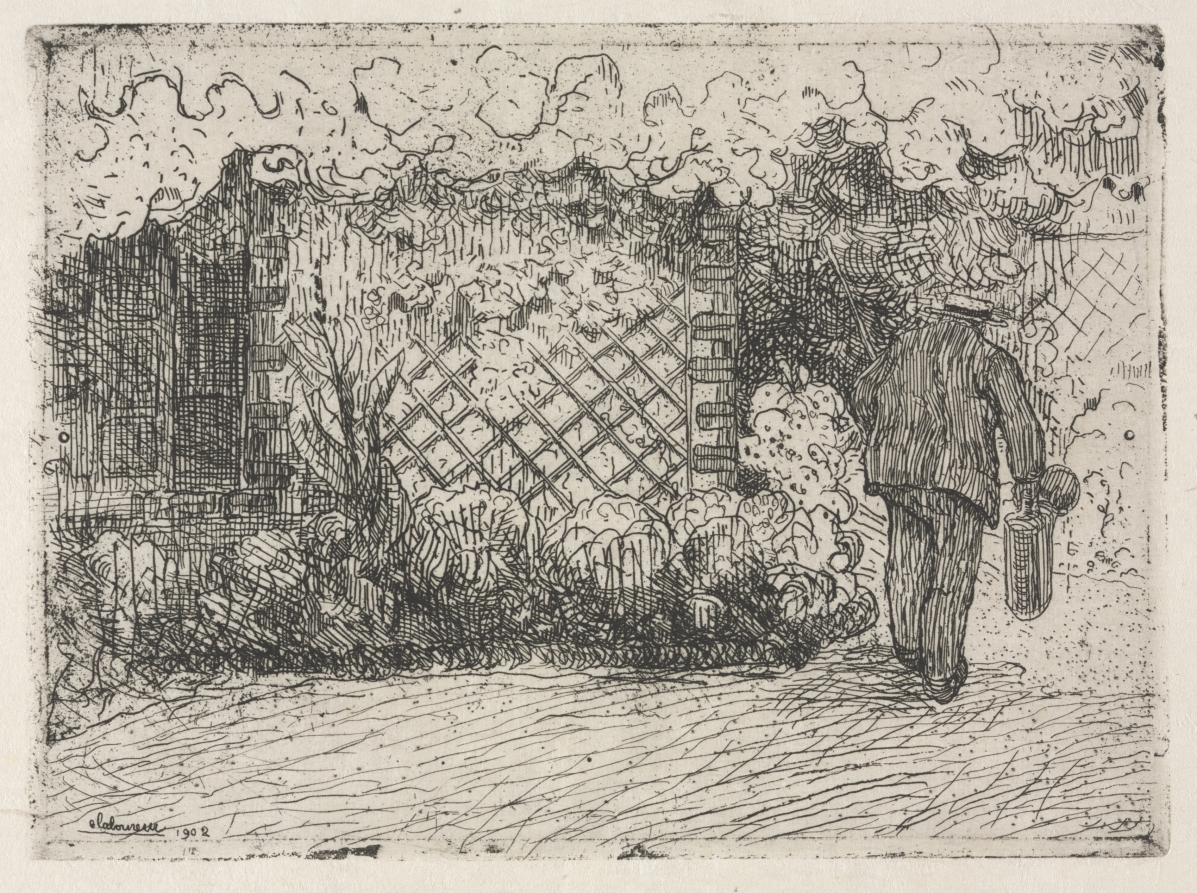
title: Watering Can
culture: France, 20th century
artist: Jean-Émile Laboureur (French, 1877–1943)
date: 1902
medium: etching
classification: Print